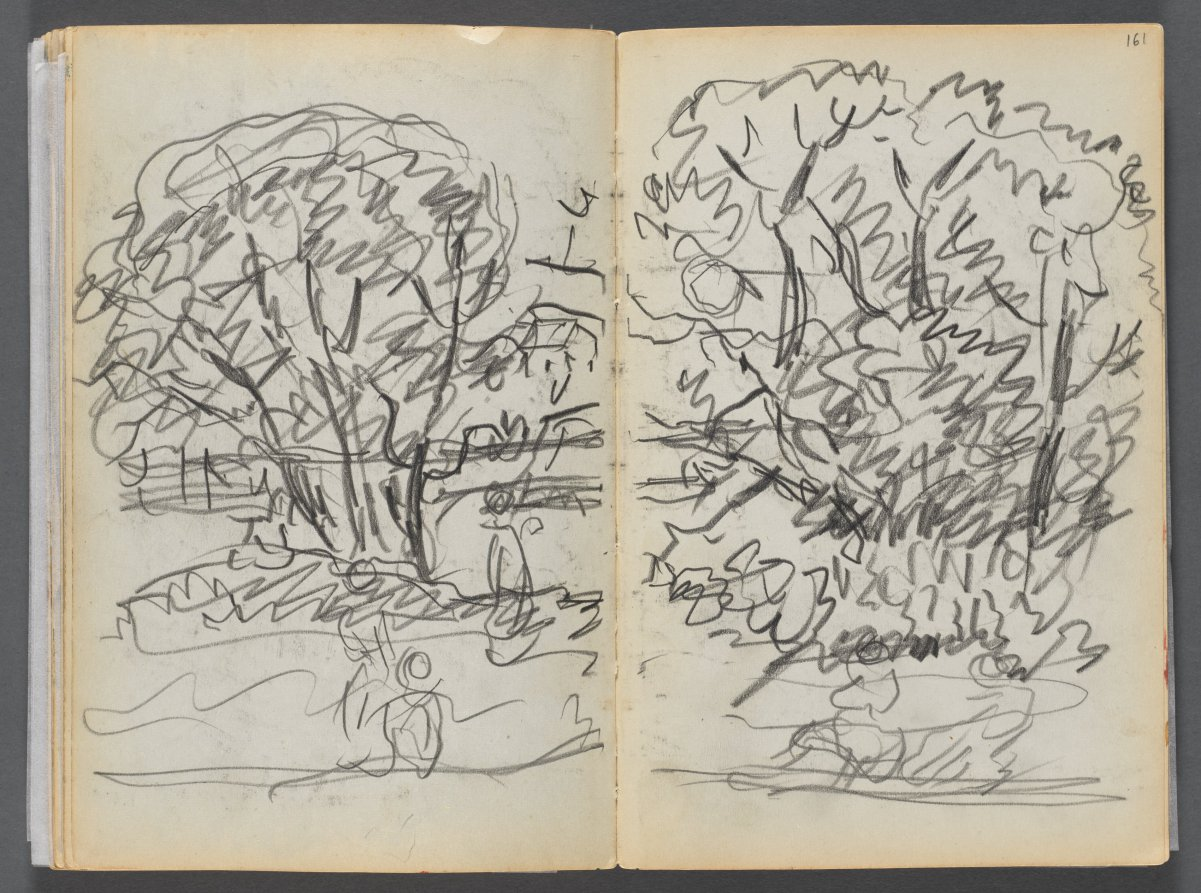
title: Sketchbook- The Granite Shore Hotel, Rockport, page 160 & 161: Landscape with Figures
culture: America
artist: Maurice Prendergast (American, born Newfoundland [now Canada], 1858–1924)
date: 1905–10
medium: graphite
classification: Bound Volume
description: This sketchbook contains 72 pages of pencil drawings and 9 watercolors of Cape Ann. On the inside of the cover Prendergast wrote the address of the Granite Shore Hotel in Rockport, Massachusetts.